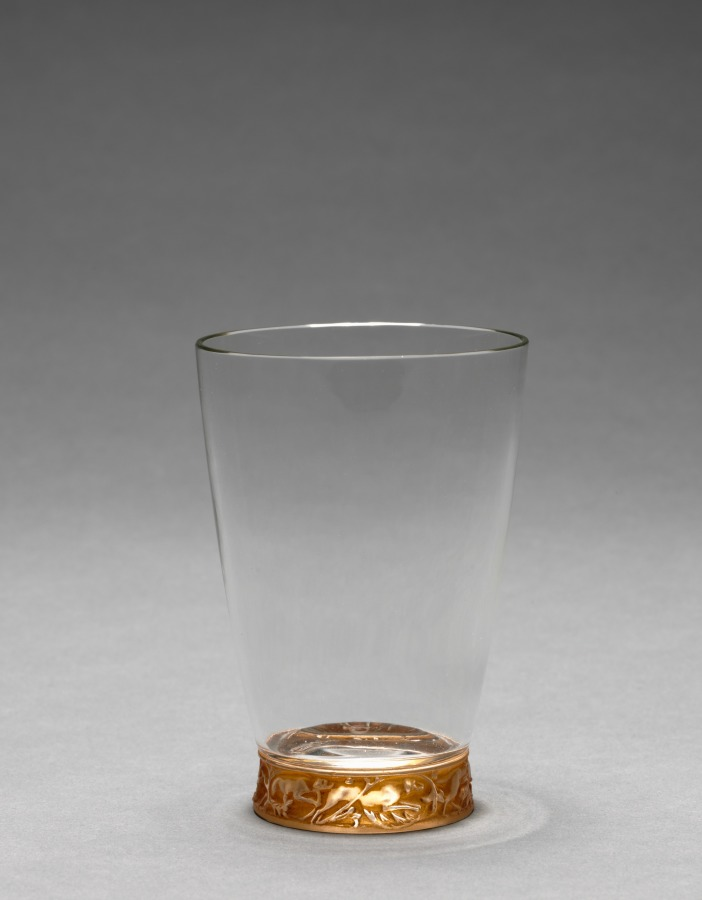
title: Ring of Dogs Water Gobelet (Gobelet bague chiens)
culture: France, 20th century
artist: René Lalique (French, 1860–1945)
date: c. 1913–21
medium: glass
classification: Glass